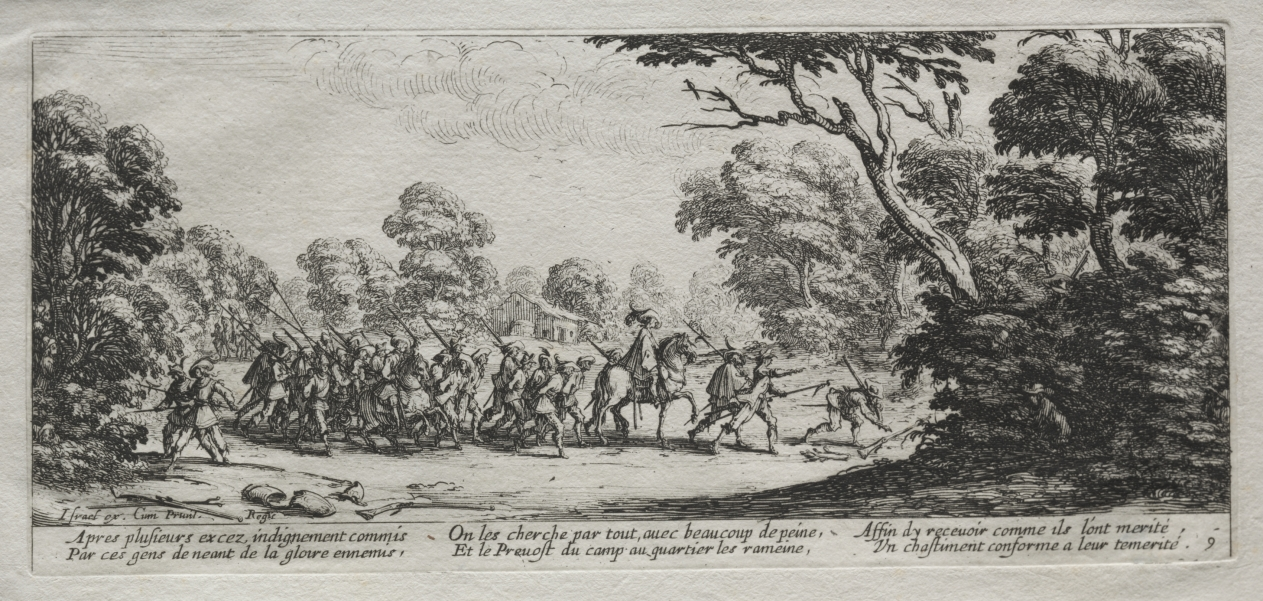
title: The Miseries of War: Arrest of Malefactors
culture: France, 17th century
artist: Jacques Callot (French, 1592–1635)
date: 1633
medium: etching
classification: Print